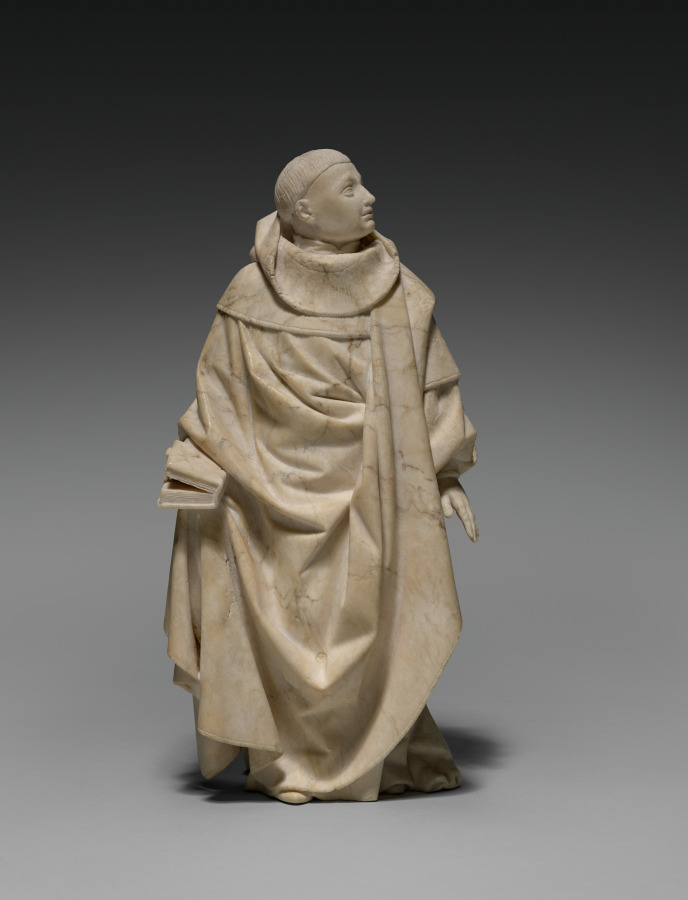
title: Mourner from the Tomb of John the Fearless and Margaret of Bavaria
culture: Spanish, Burgundy, Dijon, 15th century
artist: Jean de la Huerta (Spanish, active Burgundy, 1431–62)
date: 1443–45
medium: salins alabaster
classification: Sculpture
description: This monklike figure has a variously textured monochrome surface. Alabaster’s softness made it easy to carve details like the fabric and fur of the mourner’s robe and the codex pages in his hand. This is one of 40 mourners from an elaborate funeral procession beneath an intricately carved alabaster arcade. This mourner comes from the monastery of Champmol near Dijon, which became a primary burial place for Burgundian dukes. The sculpture was part of the tomb of John the Fearless (1371–1419), commissioned by his son Philip the Good (1396–1467), modeled after the earlier monument for Philip the Bold.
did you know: A plaster cast of this mourner adorns the Tomb of John the Fearless and Margaret of Bavaria in Dijon, France.